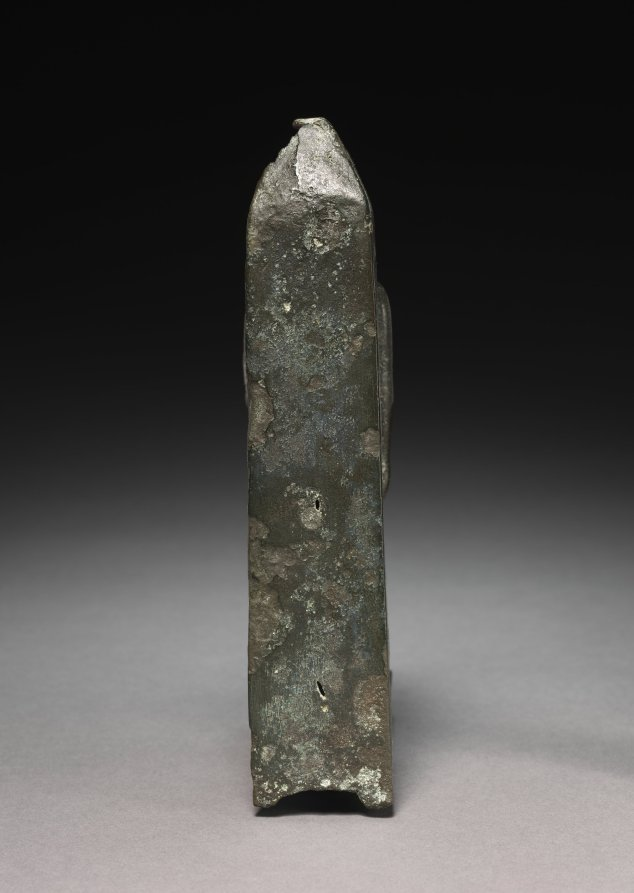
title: Statuette of Sekhmet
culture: Egypt, Late period (715–332 BCE), Dynasty 26 or later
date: 664–525 BCE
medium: bronze, figure solid cast, obelisk hollow cast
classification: Sculpture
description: The lion-headed goddess Sekhmet strides forward wearing a long, tight-fitting dress and striated wig indicating her divine nature. Behind her is an obelisk that is hollow and originally open at the bottom. Her left hand would have held an attribute such as a staff, which is now lost.